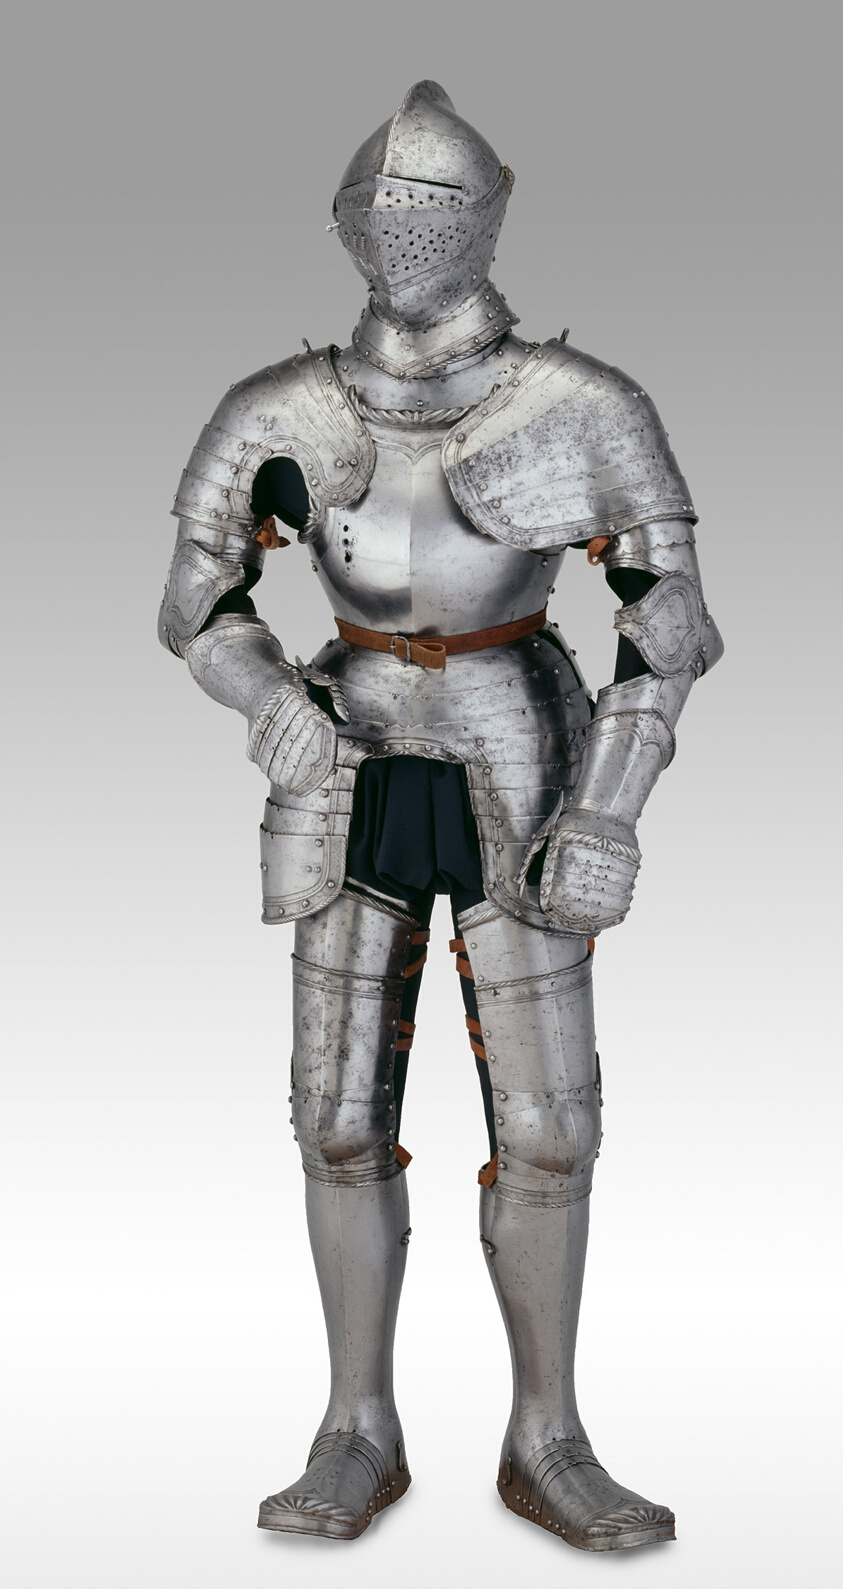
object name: Armor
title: Portions of a Field Armor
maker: Austrian, Innsbruck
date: c. 1540 with some modern restoration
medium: Steel and leather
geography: Innsbruck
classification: suit; armor; arms and armor